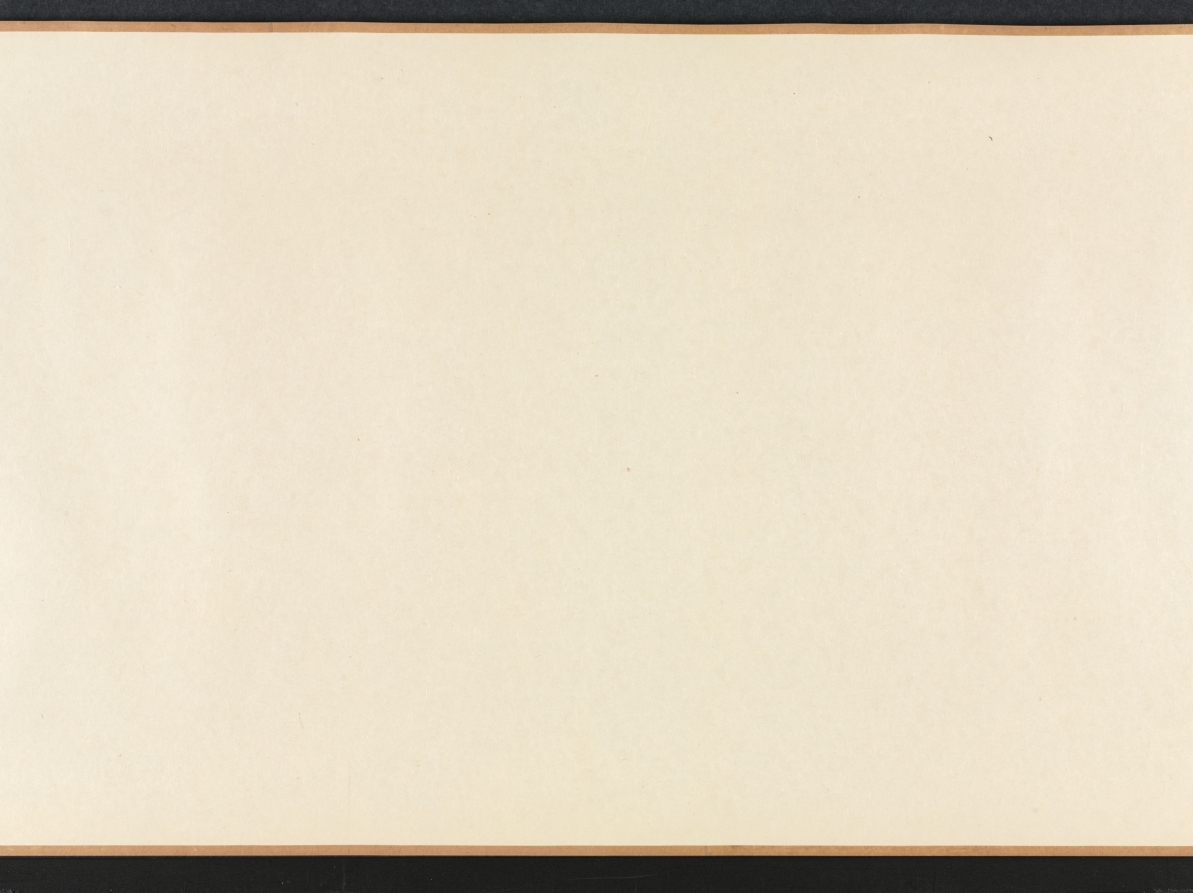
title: Hall of Lofty Pines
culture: China, Qing dynasty (1644-1911)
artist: Wang Hui (Chinese, 1632–1717)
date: 1703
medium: handscroll; ink and color on paper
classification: Painting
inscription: [題] 松喬堂圖 康熙癸未夏六月, 海虞耕煙散人王翬畫。[印]王翬之印; 石谷. [左下] 來青閣; 耕煙野老時年七十有二.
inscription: 松喬堂圖一卷，海虞石谷王君為靜海近公厲少司冦公作也。圖成于癸未之夏。未幾而公遂仙去。公令子今編修君南湖屬余題跋其後。余與公同官侍從，交契最深。側見公之清修純德，蔚為聖天子所眷重。侍直內廷，密勿贊襄，幾二十餘年。蒼生之所以受賜，士林之所以沐德者，天下莫能窺，在廷莫能悉。而公卒不言。以故宸衷日益契，恩禮亦日益渥。雖年逾懸車，時有歸老之念。而上固不聼公之去。其所謂松喬堂者，御書以賜公者也。蓋以松比公之清風勁節，而歲寒不改，經霜彌茂。則又以期公之壽考未有艾焉。公知此身未易乞，而山林槃磵之樂，止可寄諸寤思。此松喬堂圖之所由作也歟。石谷此圖，結構精密，筆墨超邁。其寫樹木之蒼蔚，堂宇之靚幽。恍見摩詰輞川樂天廬山之勝。獨惜公未得一日徜徉故園以償其願。即繪於圖亦未得以永其趣，此編修君之所以眷眷不忘也。雖然千歳之松喬，下蔭百畝，上以修棟梁之需。然則上當日名堂之意，不更望於後之人襲其芘而養其材也哉。吾願編修君之寶斯圖。并望君之塗塈丹雘，大其堂構也已矣。 康熈丙戍重陽三日，雲間王鴻緒跋。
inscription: 10 additional seals: 1 seal of Li Duna 勵杜納 (1628–1703); 4 seals of Zha Ying 查瑩 (jinshi of 1766); 5 seals of Li Yun (dates unknown).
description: Wang Hui 王翬, a leading painter in the orthodox school of the early Qing dynasty (1644–1911), was commissioned to paint this landscape with a country estate for Li Duna 勵杜納 (1628–1703), vice minister of justice in Emperor Kangxi’s court. The emperor had honored Li by granting him a piece of calligraphy with the name of Li’s retirement retreat, “Hall of Lofty Pines.” He drew a comparison between pines and Li’s upright character, resilience, and longevity. Wang Hui’s painting was supposed to allow Li to imagine living in a beautiful, secluded compound among the hills and pines. Sadly, Li died before seeing the completed painting and before receiving the emperor’s permission to retire. The landscape begins with peaceful riverbanks and low hills. The pines around the estate in the middle of the handscroll are truly lofty, some stretching even beyond the frame of the painting. Li Duna, the estate’s owner, is shown twice in his serene mountain retreat: first approaching the entrance to the compound with two servants at the right, and then later in the scroll, to the left, reading in the comfort of an inner room.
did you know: One servant carries the estate owner's carefully wrapped qin, a type of zither.